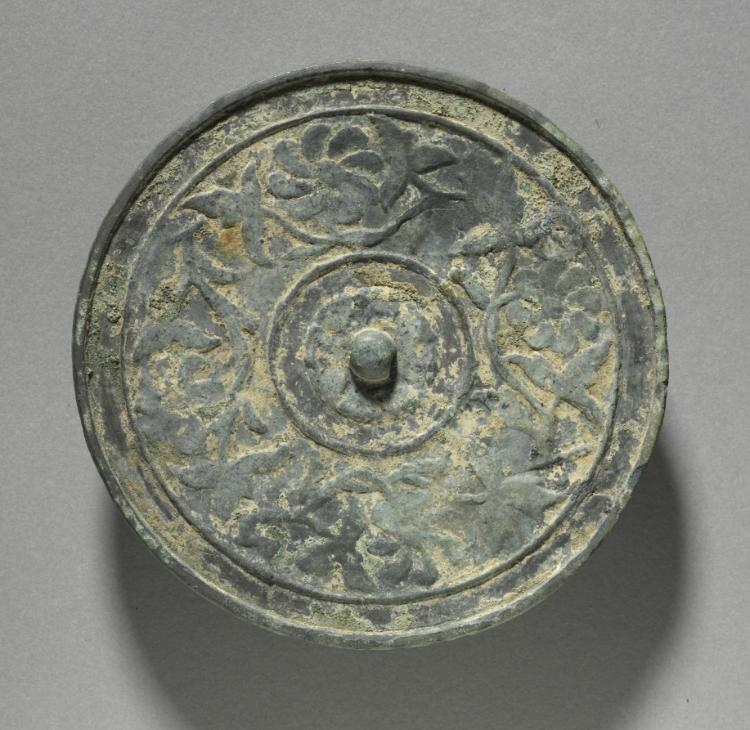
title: Mirror with Scroll Design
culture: Korea, Goryeo dynasty (918–1392)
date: 918–1392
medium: bronze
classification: Metalwork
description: From ancient times, a mirror assumed various roles: a ritualistic tool, a diplomatic gift, and a luxury commodity. During the Goryeo dynasty (918–1392), which saw the great advancement of metallurgy, the royal court was the center of distributing sophisticated bronze artifacts. According to historical records, on the seventh day of the Lunar New Year, the king bestowed a bronze mirror inscribed with auspicious symbols upon each court official as part of a ceremony to celebrate the Day of Humans. This explains why a large quantity of bronze mirrors were excavated from elite tombs.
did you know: Due to its origin as an important tool in religion and politics, mirrors are often mentioned in many Korean proverbs that warn certain behaviors.